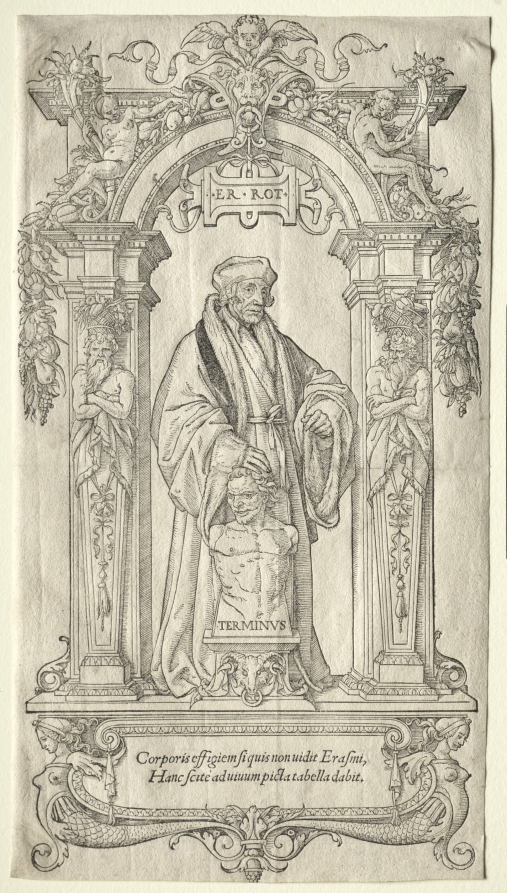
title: Erasmus of Rotterdam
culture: Germany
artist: Hans Holbein the Younger (German, active England and Switzerland, 1497/98–1543)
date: c. 1520–25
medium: woodcut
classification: Print